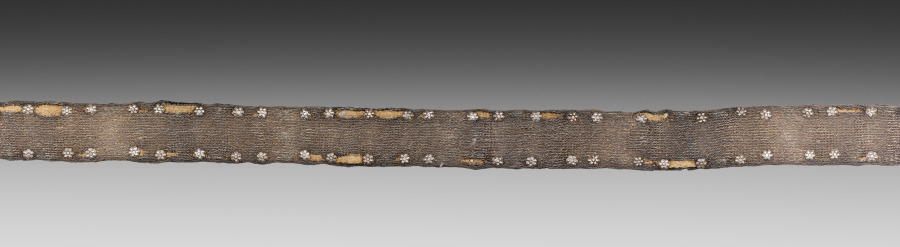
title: Belt for a Lady's Dress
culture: Italy, Siena(?)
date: c. 1375–1400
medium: basse-taille enamel and gilding on silver, silver thread, gilt-silver buckle, cast and chased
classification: Jewelry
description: Because of its extraordinary richness, this belt (also known as a girdle) was both an ornament for the body and an object of great personal luxury. Almost eight feet in length, belts like this were at the height of fashion for both men and women. After being passed around the waist and through the buckle, one end of the belt would fall to the hem of the garment. The belt's many colorful enamel plaques are worked in translucent enamel over decoration engraved into the silver beneath (an enameler's technique known as basse-taille). Within the plaques and cast into the buckle are scenes of courtly love, musicians, and fantastic animals. A large number of translucent enamels were made for secular objects during the late Middle Ages for use on jewelry, cups, garment clasps, and similar objects. This belt is a rare survival among these now scarce objects.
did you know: Look closely at the tiny scenes of courtly love on the plaques that adorn this belt. Given their size, these scenes were designed for the enjoyment of the woman who wore this belt over a sumptuous dress rather than an admirer from a distance.